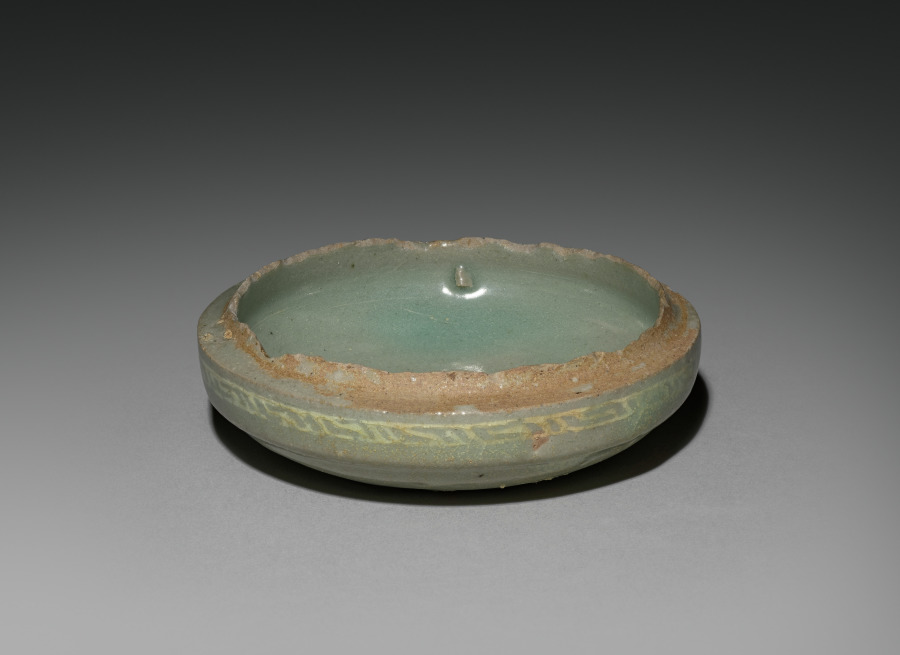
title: Pigment Box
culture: Korea, Goryeo dynasty (918–1392)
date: 1200s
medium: inlaid celadon ware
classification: Ceramic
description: Celadons, spoons, seals, and bronze mirrors were the most common burial objects in tombs during the Goryeo period (918–1392). Once used to contain colored powder, rouge, and eyebrow gel for makeup, this small container was one of the standard goods that furnished elites' tombs. Both women and men used the grain powder of rice or millet for whitening their skin, safflower extract for rouge, and plant ash or soot for eyebrow gel. Yet, natural-looking makeup seems to have been the most favorable one in Korea according to the travelogue by Xu Jing (1091–1153), the Chinese diplomat who visited Korea in 1123.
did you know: This ceramic container was used to store either incense or cosmetics.